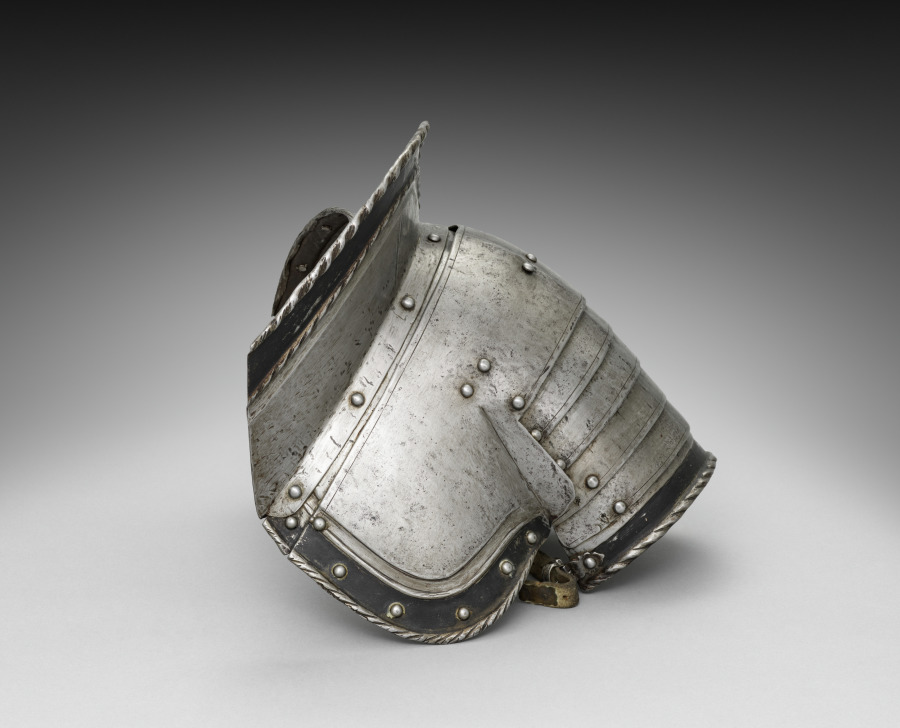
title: Left Pauldron with Guard Brace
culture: Germany, 19th century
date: 1801–1900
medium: steel with black paint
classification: Arms and Armor